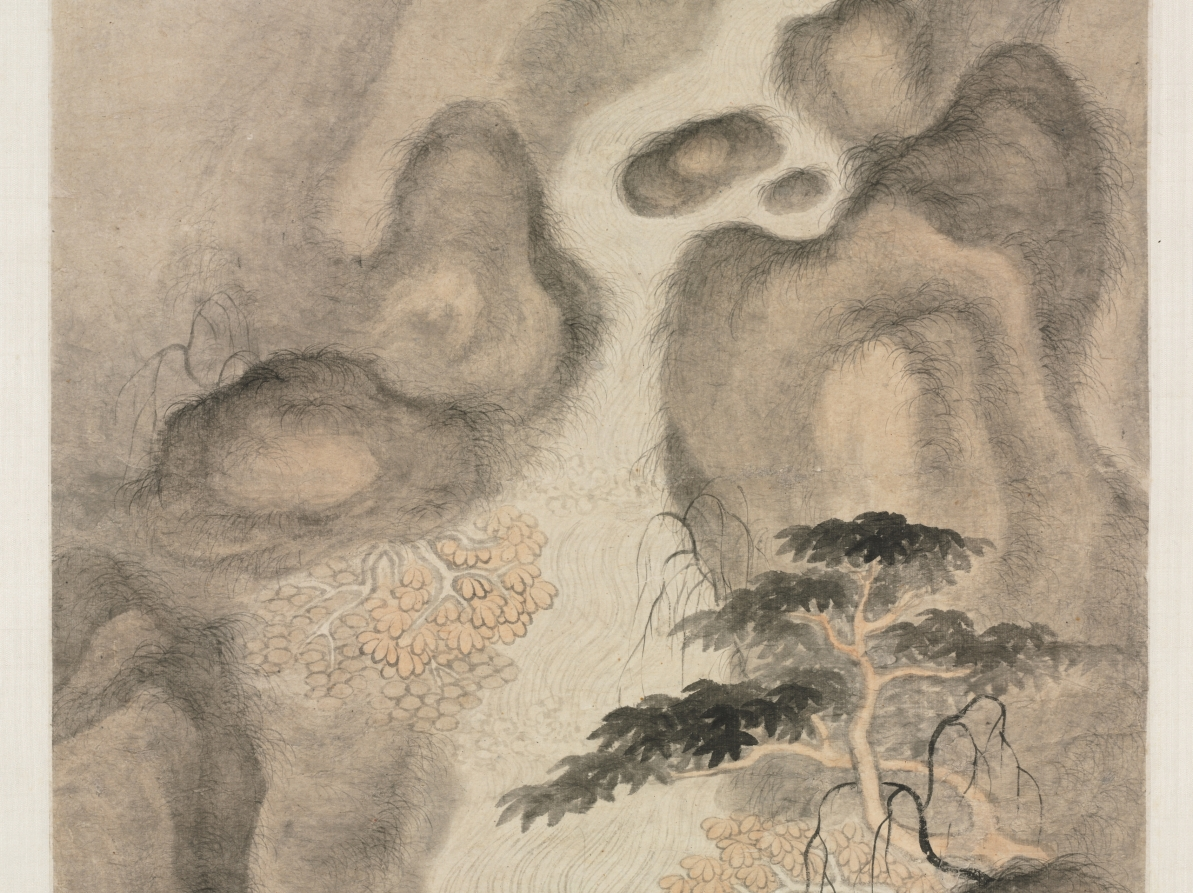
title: Nine Dragon Pool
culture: China, Qing dynasty (1644-1911)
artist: Mei Qing (Chinese, 1623–1697)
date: 1690s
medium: hanging scroll, ink and light color on paper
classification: Painting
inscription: 太古蟄龍醒，蠺叢霹靂開。 五溪雲不去，三峽雪飛來。 瞿山, 清。 [印] 梅清; 淵公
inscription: 2 additional seals: 1 of Dai Xi 戴煕 (1801–1860); 1 unidentified.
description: In the second half of the 1600s, Huangshan 黃山 (Mt. Huang or Yellow Mountain) attracted many visitors and inspired artists like Mei Qing. He probably sketched the Nine Dragon Pool on his second trip to the mountain range in 1690, at the advanced age of 68 sui. This dramatic waterfall has nine curves, each forming an emerald green pool. After heavy rain, the rushing water looks like nine white dragons.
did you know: Huangshan 黃山 is a UNESCO World Heritage site known for its spectacular rocky peaks, sea of clouds, oddly shaped pine trees, and hot springs.